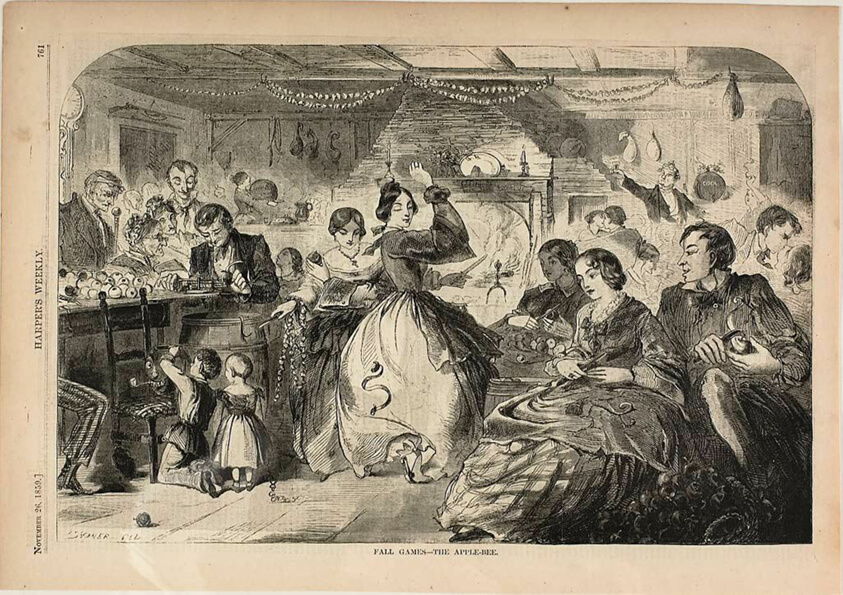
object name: Print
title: Fall Games—the Apple-Bee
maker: Winslow Homer (American, 1836-1910); published by Harper's Weekly (American, 1857-1916)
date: published November 26, 1859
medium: Wood engraving on paper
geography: United States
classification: wood engraving; print; prints and drawing